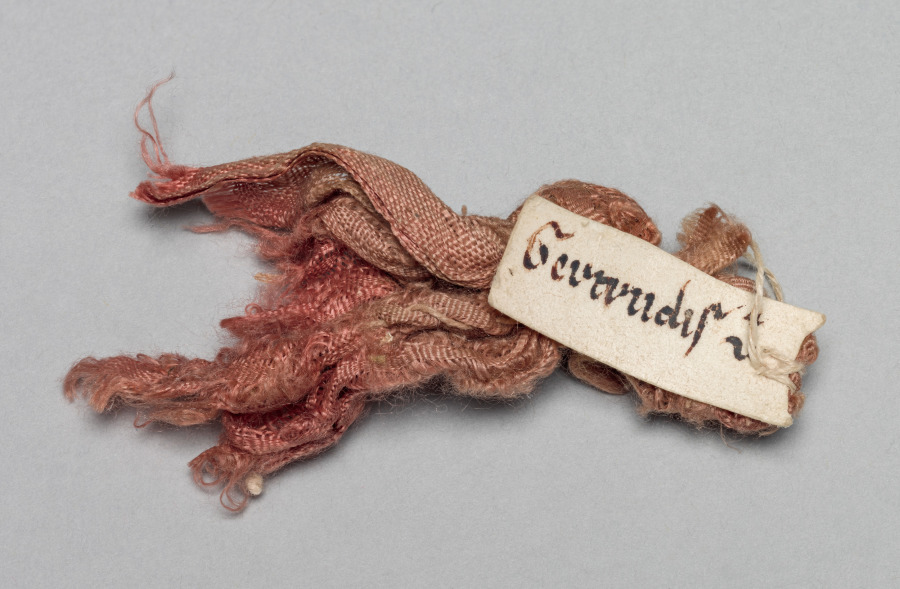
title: Relic of St. Gertrude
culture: Germany, Lower Saxony?, Romanesque period, 11th century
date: c. 1045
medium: Plain weave variant rose colored silk with an extant selvage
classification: Metalwork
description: This relic is housed in the portable altar commissioned by Countess Gertrude of Brunswick, one of the Guelph Treasure’s earliest and most sumptuous objects.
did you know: An X-ray revealed no solid material is wrapped in this piece of cloth.